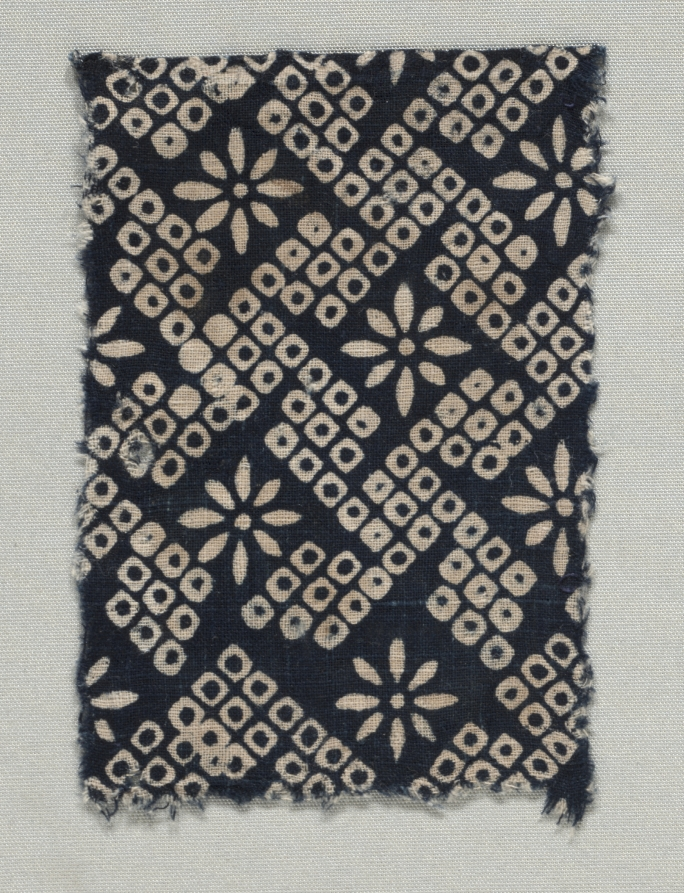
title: Fragment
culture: India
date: 1400s ?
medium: Cotton: dyed, stamped resist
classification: Textile